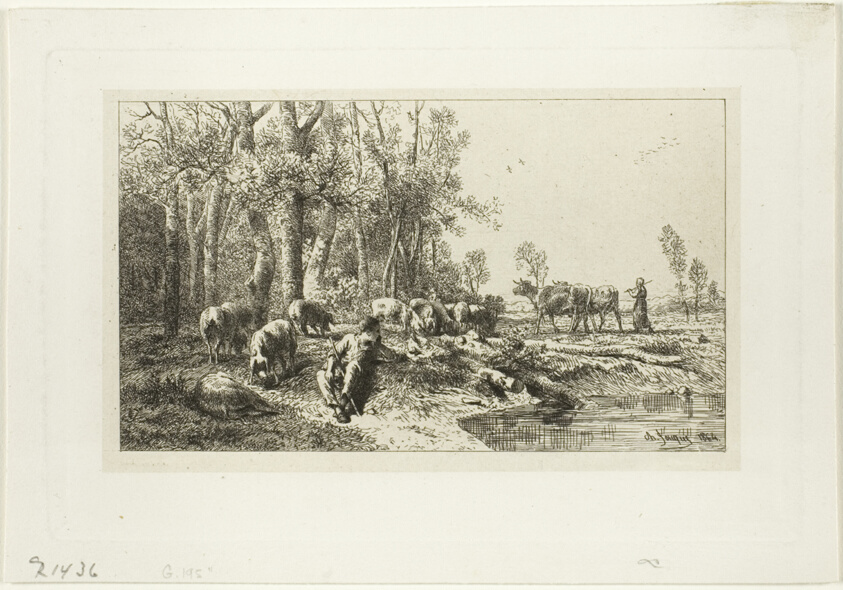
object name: Print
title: Winter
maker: Charles Émile Jacque (French, 1813-1894)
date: 1846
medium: Etching on light gray China paper laid down on ivory wove paper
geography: France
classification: etching; print; prints and drawing